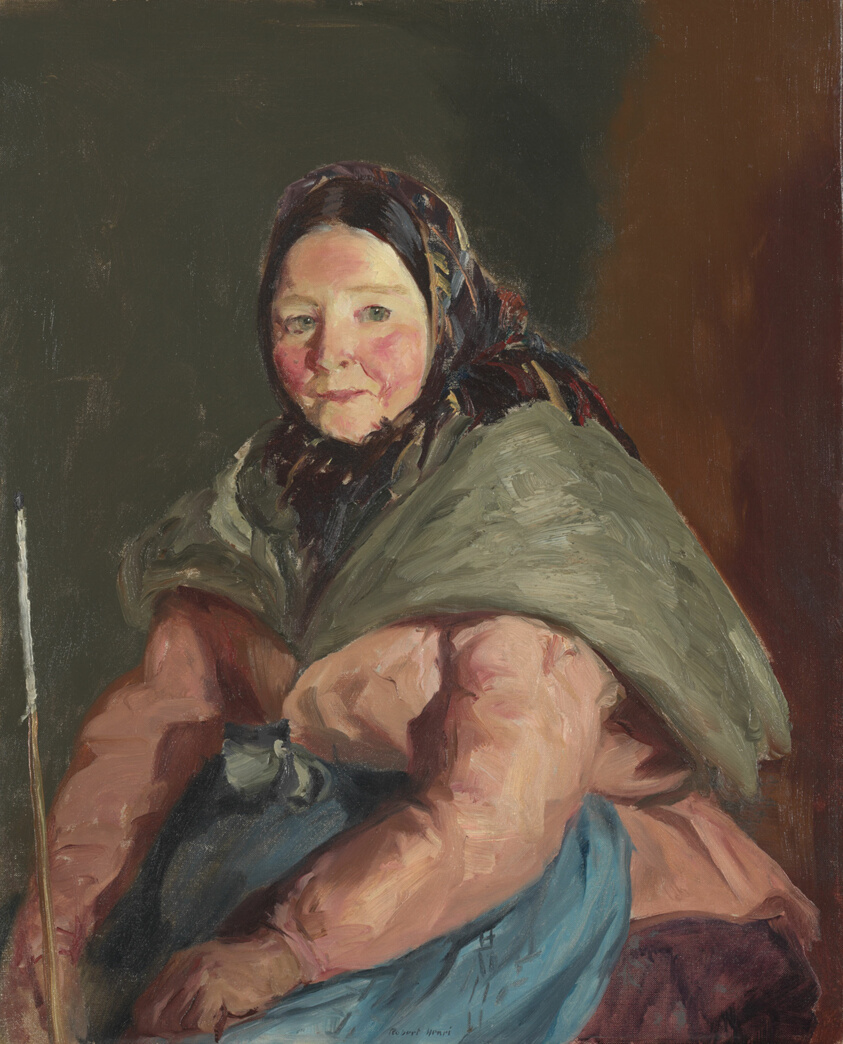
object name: Painting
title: Herself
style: Realism, Modernism, Ashcan School, 20th Century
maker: Robert Henri (American, 1865–1929)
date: 1913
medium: Oil on canvas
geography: United States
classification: painting; american arts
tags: fashion, Century of Progress, world's fairs, Chicago World's Fairs, people, portraits